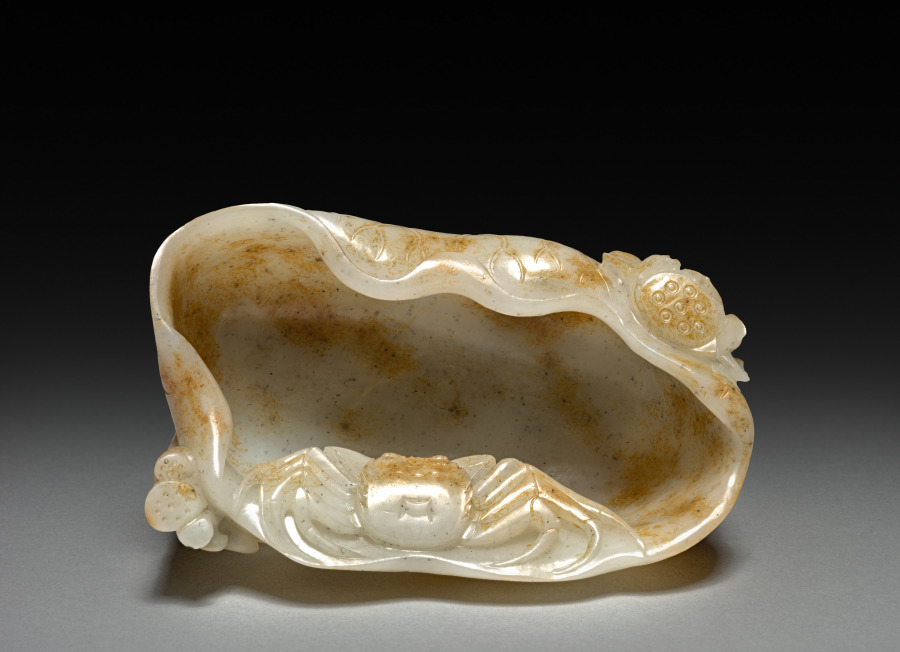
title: Cup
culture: China, Qing dynasty (1644-1911), Kangxi reign (1662-1722)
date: 1662–1722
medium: jade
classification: Jade